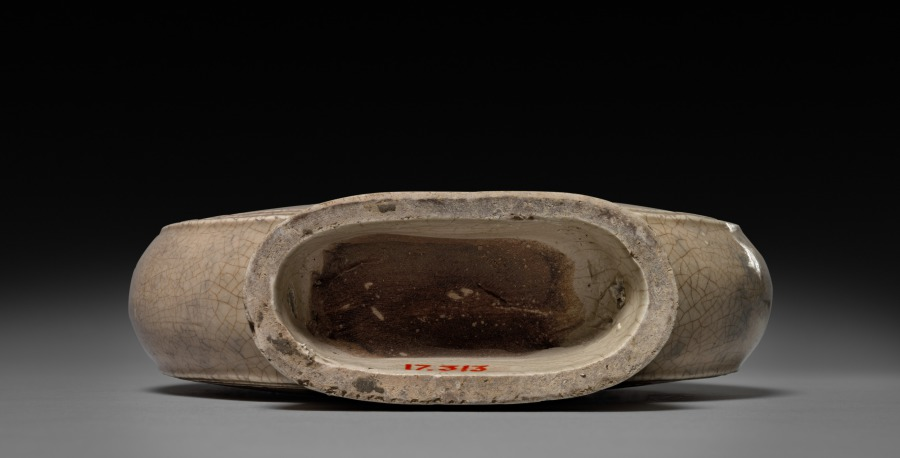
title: Pilgrim Bottle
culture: China, Ming dynasty (1368–1644)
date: 1368–1644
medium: porcelain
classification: Ceramic